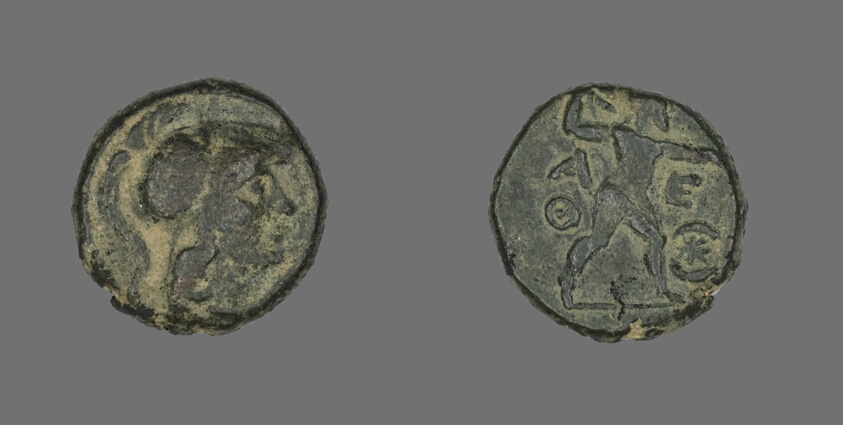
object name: Coin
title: Coin Depicting the Goddess Athena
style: greek, ancient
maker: Greek, minted in Athens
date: after 322 BCE or 220-83 BCE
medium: Bronze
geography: Athens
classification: coin; ancient art